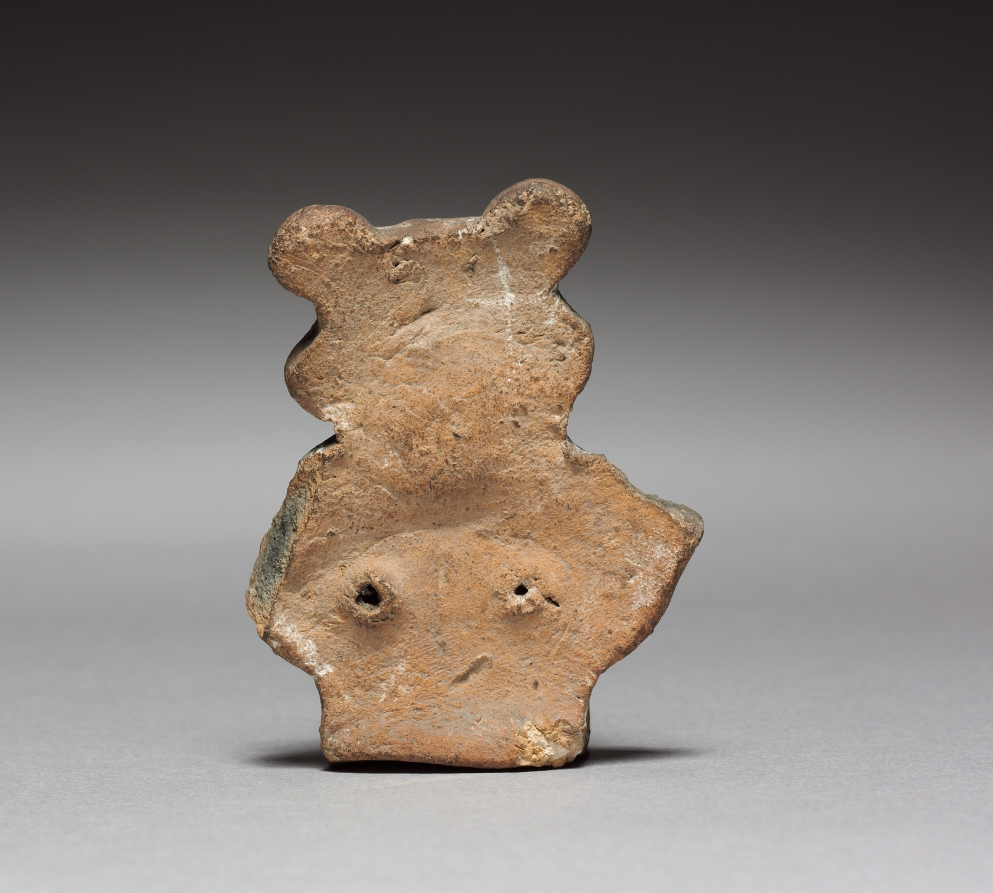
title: Figurine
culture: Mexico, Aztec, 14th century-16th century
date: 1325–1521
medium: terracotta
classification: Ceramic